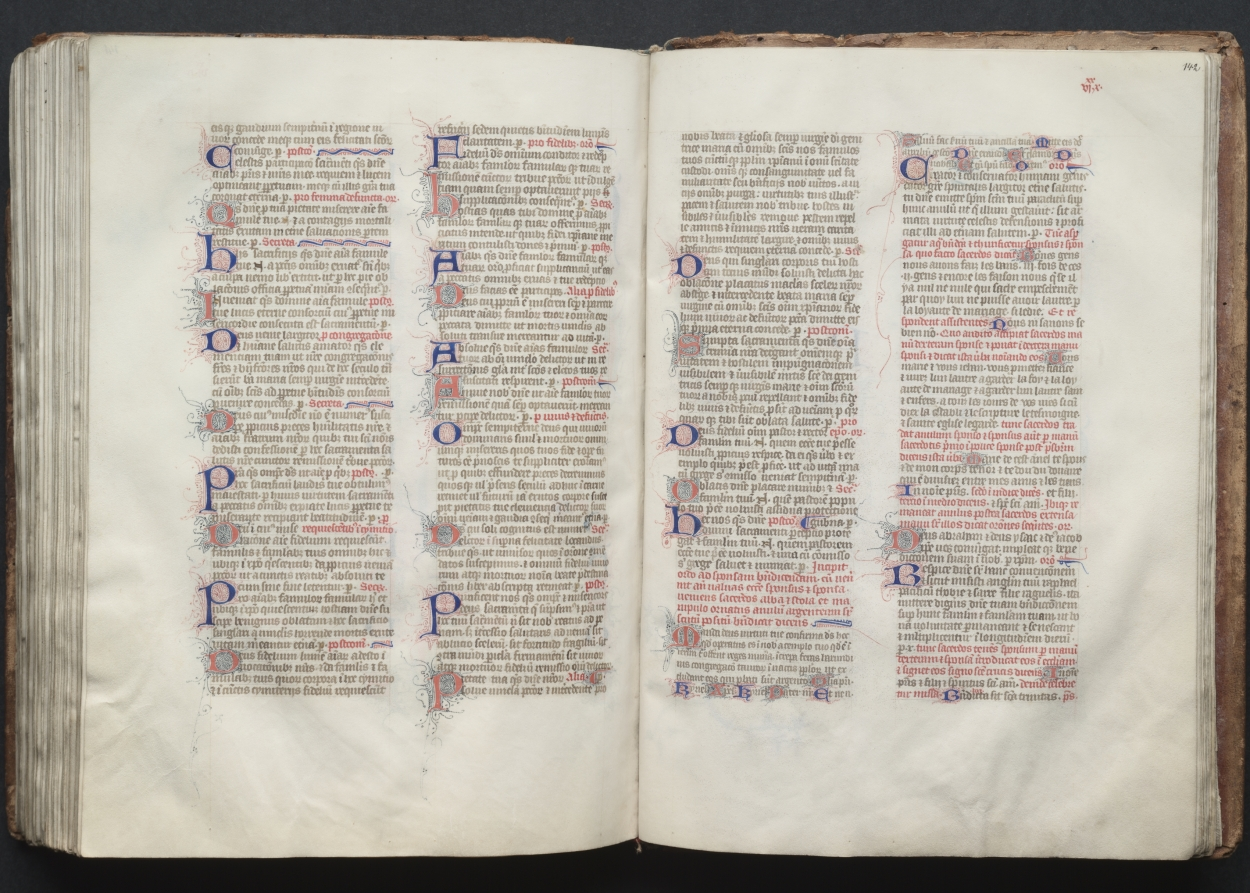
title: The Gotha Missal: Fol. 142r, Text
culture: France, Paris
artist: Master of the Boqueteaux (French)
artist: and Workshop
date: c. 1375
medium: ink, tempera, and gold on vellum; blind-tooled leather binding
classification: Bound Volume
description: The style and quality of this manuscript's decoration is typical of deluxe Parisian books made for aristocratic or royal patrons. Most of the book's decoration appears to be the work of the Master of the Boqueteaux, an artist active at the court of King Charles V (died 1380). His style was apparently shared by a number of book illuminators working in and around Paris. It is very possible that the Gotha Missal belonged to Charles V, but is not provable because the manuscript has no royal portraits and lacks a colophon. Given the book's magnificent decoration, however, it would seem that it was produced for a Valois prince, if not for the king himself. The manuscript receives its name from the German dukes of Gotha, its later owners.